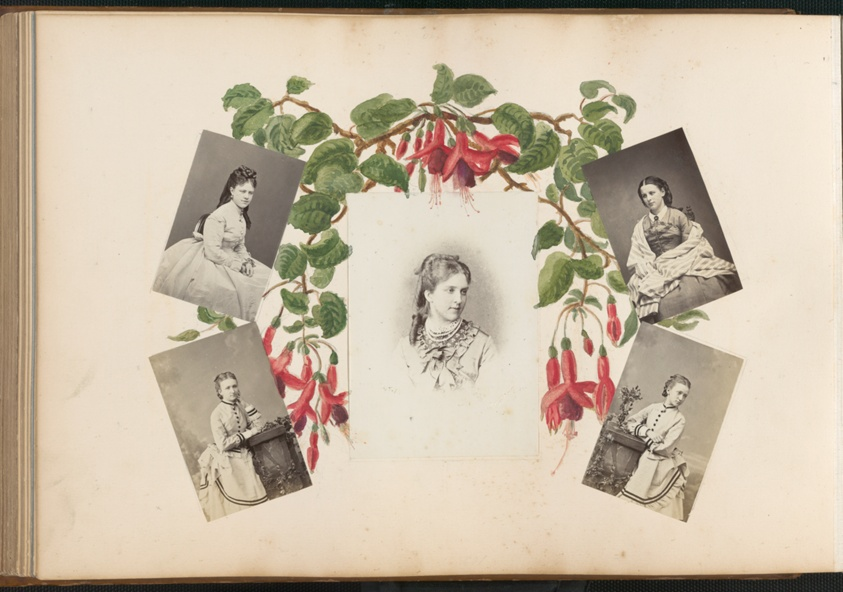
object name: Photograph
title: The Madame B Album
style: 19th century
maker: Marie-Blanche Hennelle Fournier (French, 1831–1906)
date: 1870s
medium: Albumen prints with watercolor (in album)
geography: France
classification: photograph; albumen silver print; photography